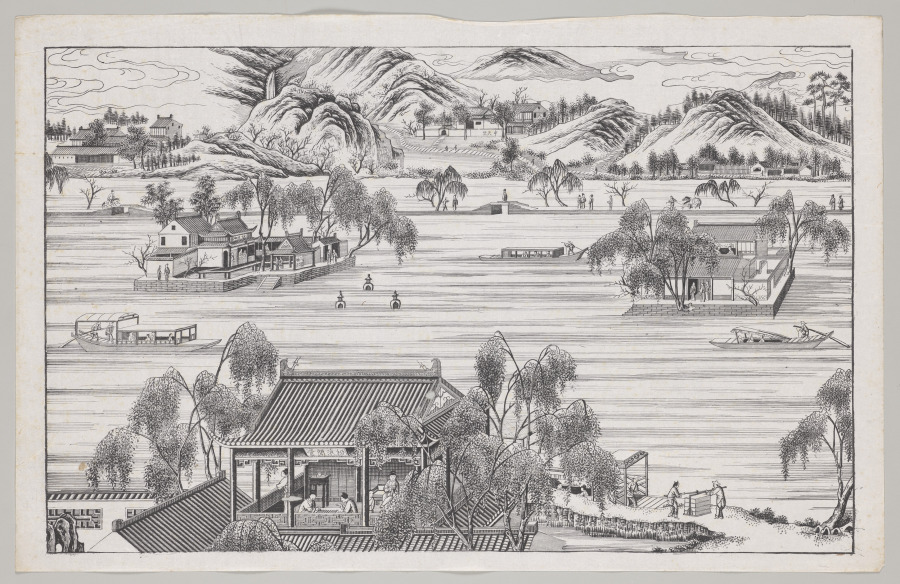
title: Westlake Panorama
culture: China, Qing dynasty (1644–1911), Qianlong reign (1736–95)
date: mid-1700s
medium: One of four woodblock prints; ink on paper; printed with three woodblocks in shades of black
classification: Print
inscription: 信德號 姑蘇管瑞玉頂細西洋畫發客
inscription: The 10 scenes on the four prints are identified by their titles: Print one: 1. Remnant Snow on Broken Bridge (Duanqiao canxue, 斷橋殘雪), 2. Lotus Breeze at Qu Winery (Quyuan fenghe, 曲院風河 [sic]). Print two: 3. Autumn Moon over Placid Lake (Pinghu qiuyue, 平湖秋月), 4. Twin Peaks Piercing the Clouds (Liangfeng chayun, 兩峰插云), 5. Spring Dawn at Su Dike (Sudi chunxiao, 蘇 堤春曉), 11. The emperor’s temporary palace (xinggong, 行宮). Print three: 6. Listening to the Orioles by the Willow Ripples (Liulang wenying, 柳浪 聞鶯), 7. Three Stupas and the Reflecting Moon (Santan yinyue, 三潭印月). Print four: 8. Watching Fish at Flower Cove (Huagang guanyu, 花港觀魚), 9. Sunset at Leifeng Pagoda (Leifeng xizhao, 雷峰夕照). 10. Evening Bell from Nanping Hill (Nanping wanzhong, 南屏晚鍾.) In print two, 11. the emperor’s temporary palace (xinggong 行宮) is also identified.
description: Revived by the southern imperial inspection tours, West Lake imagery became a popular subject during the early Qing dynasty. This panorama is composed of four prints, showing the Ten Scenes of the West Lake in Hangzhou along with other sights. The vanishing point perspective and the hatching lines that depict shading, water, or sky derive from European copperplate prints, introduced by missionaries to China, and were celebrated novelties in 18th-century Suzhou prints. These prints also reached Europe to furnish 18th-century palace interiors.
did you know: Woodblock printing in color reached a height in China in the 1600s to 1700s. The prints were executed by means of sets of separate blocks, each carved to print a different color.